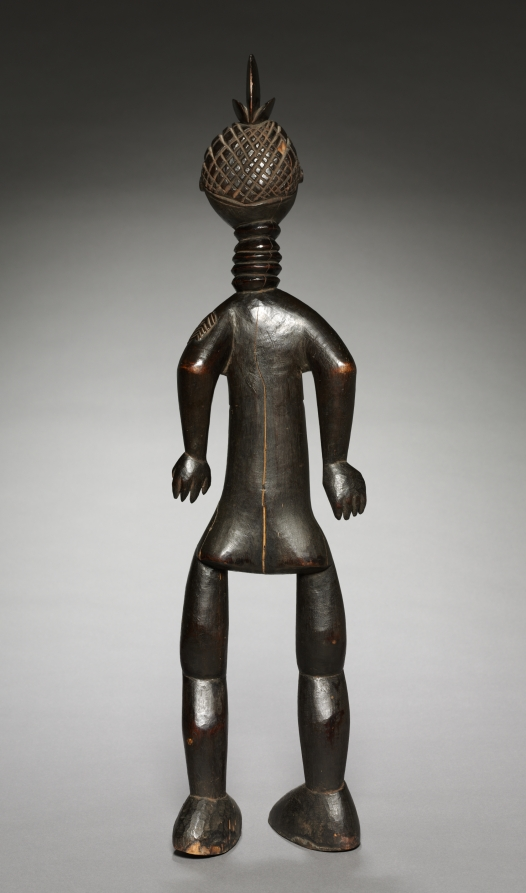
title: Female Figure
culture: Africa, West Africa, Sierra Leone, Mende or Bullom style, unknown maker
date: early 1900s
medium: wood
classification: Sculpture